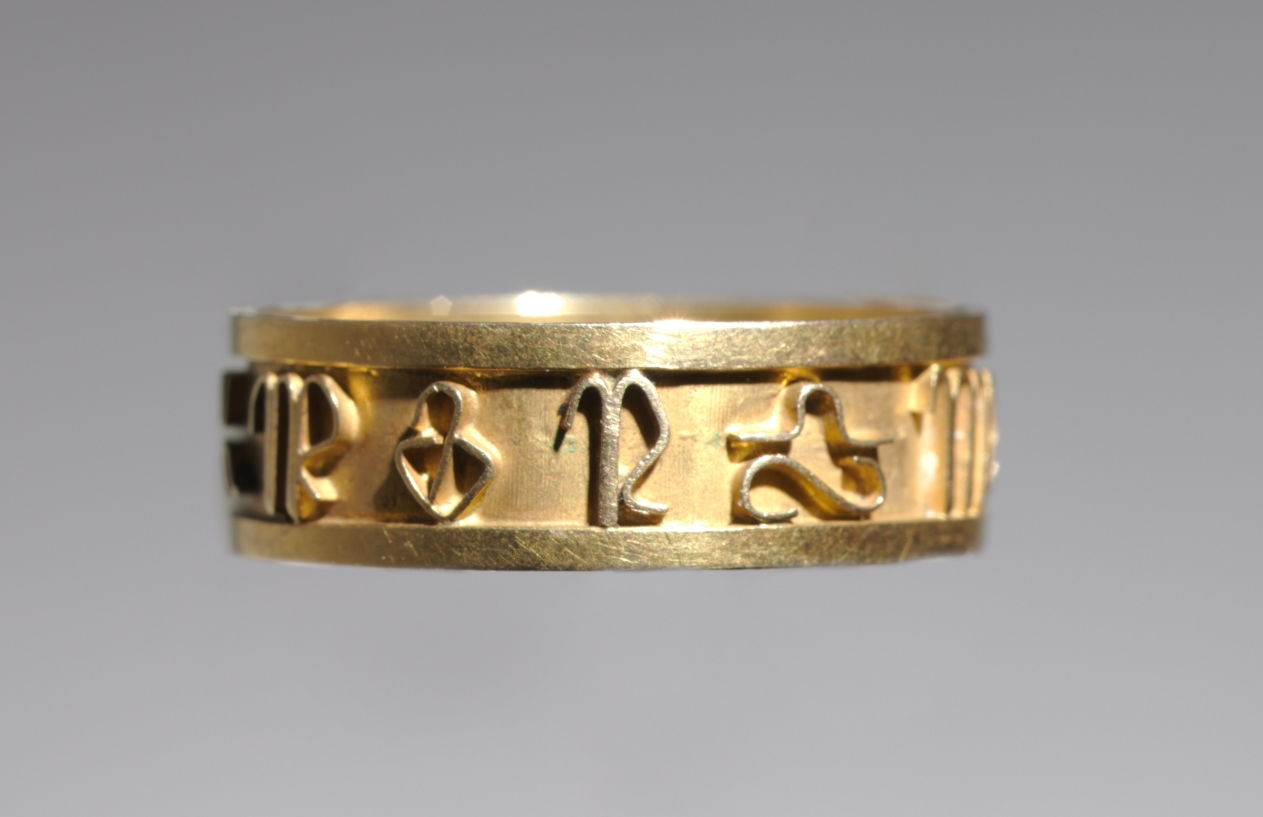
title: Ring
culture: Africa, North Africa, unknown maker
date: 1700s–1800s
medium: Gold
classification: Jewelry